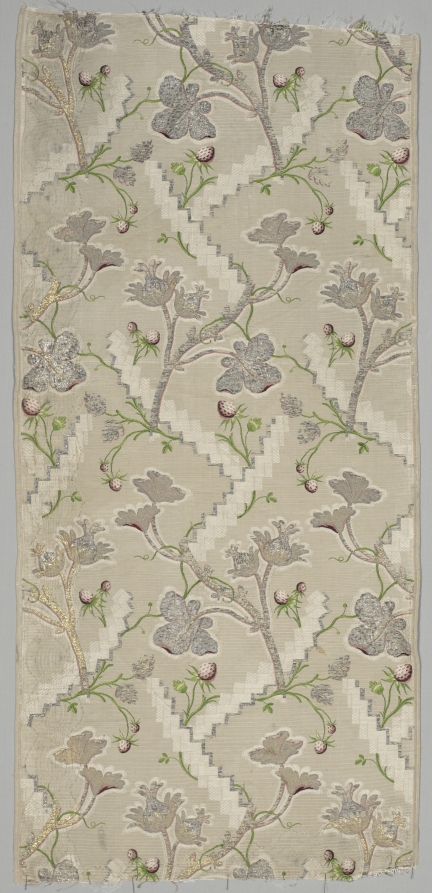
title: Silk Fragment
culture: France or Spain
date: 1725–74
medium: plain cloth, brocaded; silk and metal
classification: Textile